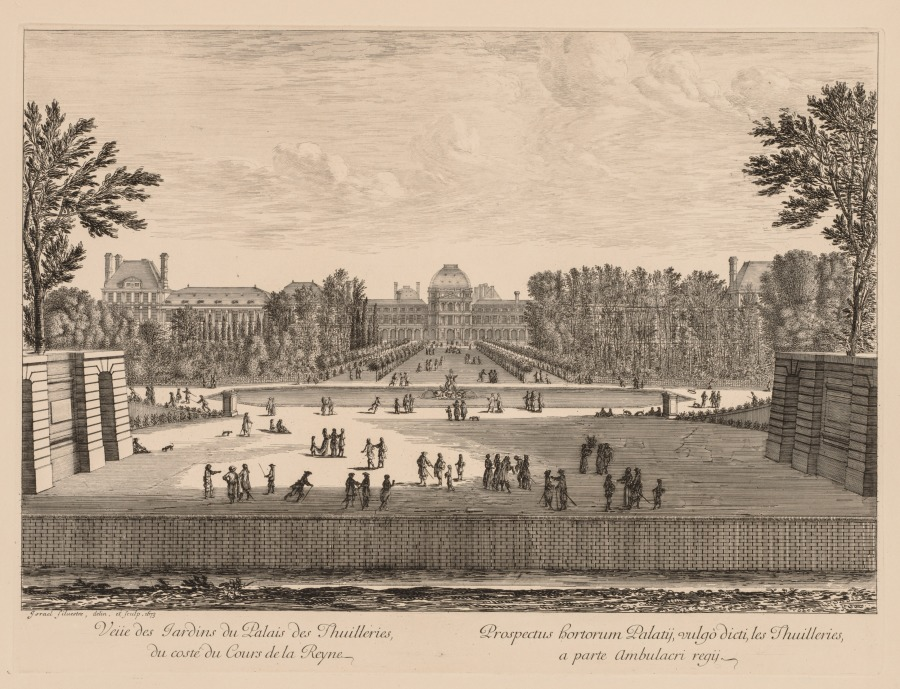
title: Vue du palais et des jardins des Tuileries, du côté du cours la Reine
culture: France, 17th century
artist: Israël Silvestre (French, 1621–1691)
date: 1673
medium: engraving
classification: Print